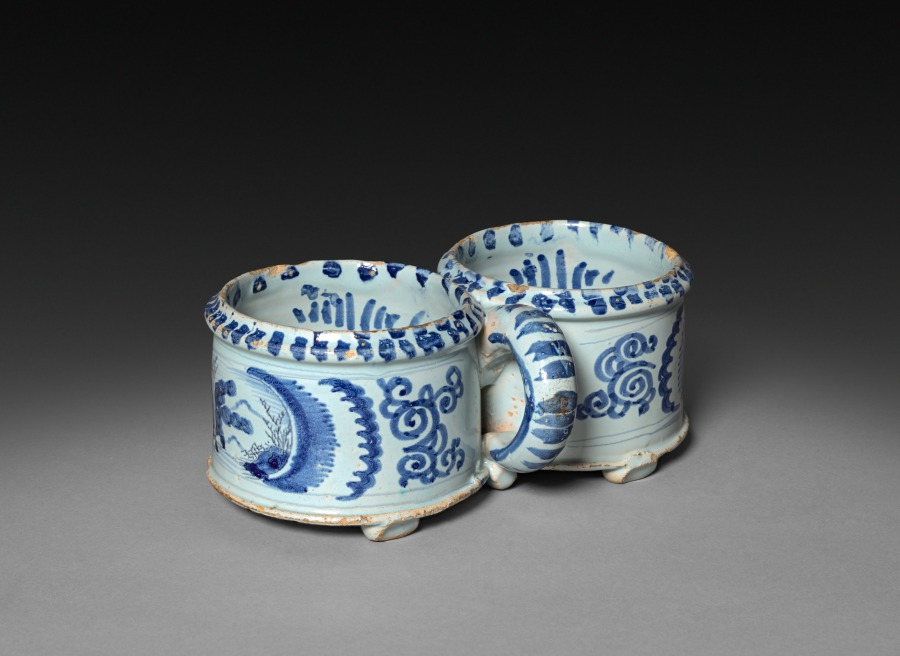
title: Cruet Stand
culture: France, early 18th Century (?)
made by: possibly by Nevers Factory (French)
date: c. 1700 ?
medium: faience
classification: Ceramic